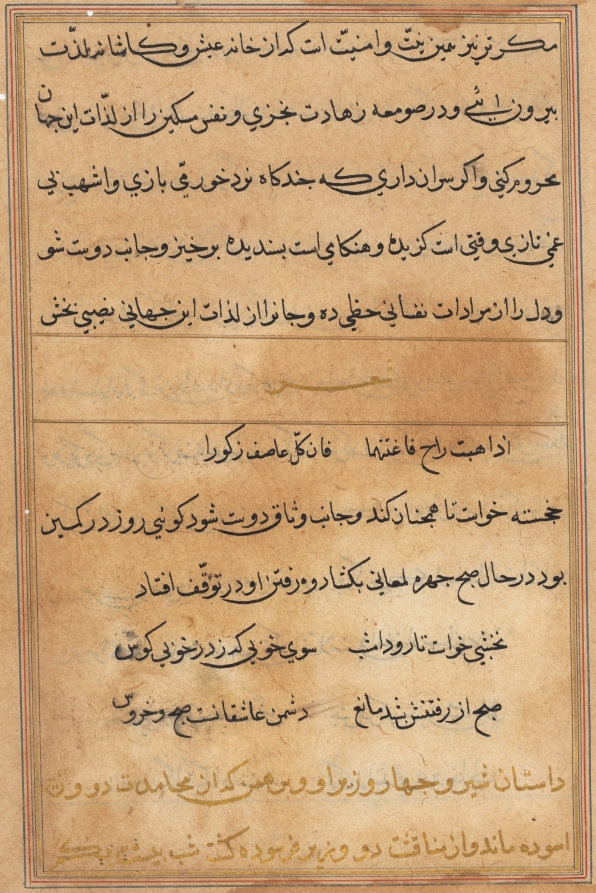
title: Page from Tales of a Parrot (Tuti-nama): text page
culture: Mughal India, court of Akbar (reigned 1556–1605)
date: c. 1560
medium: gum tempera, ink, and gold on paper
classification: Painting